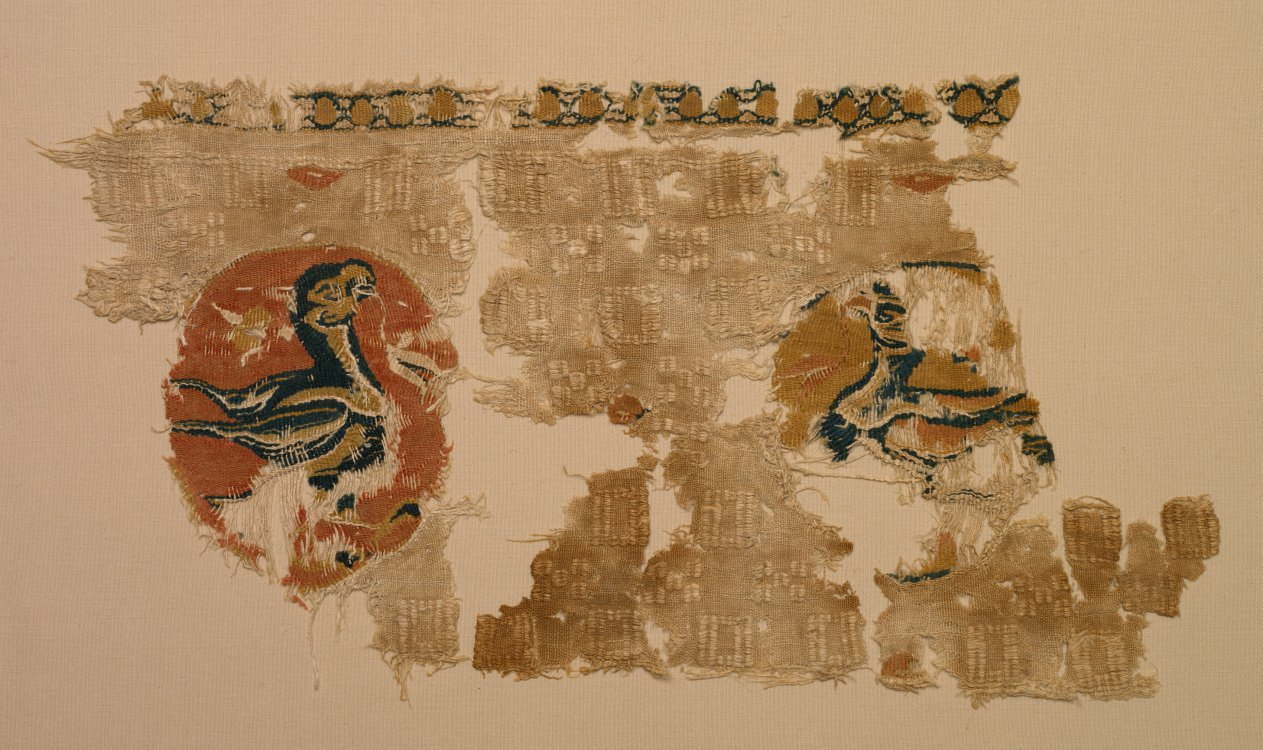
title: Hanging with birds in roundels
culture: Egypt, al-Bahnasa, Tulunid period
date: 800s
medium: plain weave with inwoven tapestry weave and supplementary wefts: linen and wool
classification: Textile